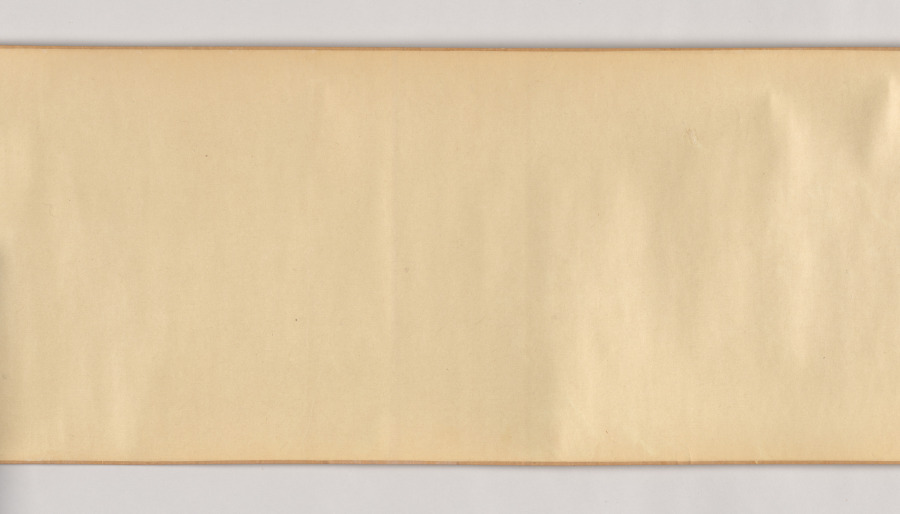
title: Three Horses and Four Grooms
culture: China, Yuan dynasty (1271-1368)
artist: Ren Renfa (Chinese, 1254–1328)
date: c. 1320s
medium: handscroll, ink and color on silk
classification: Painting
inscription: 月山道人. [印] 任氏子明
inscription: 1 colophon and 16 additional seals: 1 poem, 1 colophon dated 1552 or 1612, and 3 seals of Wang Yiying 王一瀛 (1500s); 2 seals of Liang Qingbiao 梁清標 (1620-1691); 6 seals of the Qianlong 乾隆 Emperor (r. 1736-95); 3 seals of the Jiaqing 嘉慶 Emperor (r. 1796-1821); 1 seal of the Xuantong 宣統 Emperor (r. 1908-12); 1 seal of Yu Xiezhong 余協中 (1900s).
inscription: Poem and colophon by Wang Yiying 王一瀛 (1500s): As for painters of horses in the previous dynasty, Surely the name of Yueshan [Ren Renfa] must come first. Under his brush and on his silk, They seem to have just galloped out from the imperial stud. Now as the world overflows with inferiority, Who, from the stable, can recognize a dragon-horse amidst mediocrity. Ren Yueshan [Ren Renfa] of the Yuan Dynasty was best in horse paintings. The three fine steeds he painted in this scroll are so dashing, so vigorous in spirit that they have indeed grasped some of the "brush-idea" of Han Gan. Not long ago this painting came into the possession of Mr. Gui Shanquan, who asked for my inscription. And I, while reading the old manuscripts of Hengshan [Wen Zhengming, 1470-1559], by accident, came cross the poem quoted above. As the ancients said "in painting horses, Master Han was [inspired by and produced] real horses; in composing poems, Master Su [Su Dongpo, the leading Song poet] wrote as if a painting were before him." These are truly what should be considered the two excellences; indeed, they are to be treasured. In the sixth month of the renzi year [either 1552 or 1612]. Jian feng shan ren [The Mountain Dweller of the Sword Peak], Wang Yiying, written in the Qu si ting Pavilion at Chiyang.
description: Ren Renfa's horse images are elegant in appearance and vigorous in spirit. His work attracted not only Chinese scholars but also the Mongols at the imperial court. Inspired by the contemporary scholarly interest in restoring a sense of antiquity in art—an artistic direction led by Zhao Mengfu that exerted a great impact in the Yuan art scene—Ren Renfa, like Zhao Mengfu, modeled his depictions of horses after the Song master Li Gonglin. Another key style component that Ren introduced to this genre was a revival of the Tang classical tradition. The refined color treatment of the horses as seen here was derived from the Tang master Han Gan.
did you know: Only the elegant first horse with a white blaze is accompanied by two grooms, as if its lightning speed required extra supervision.